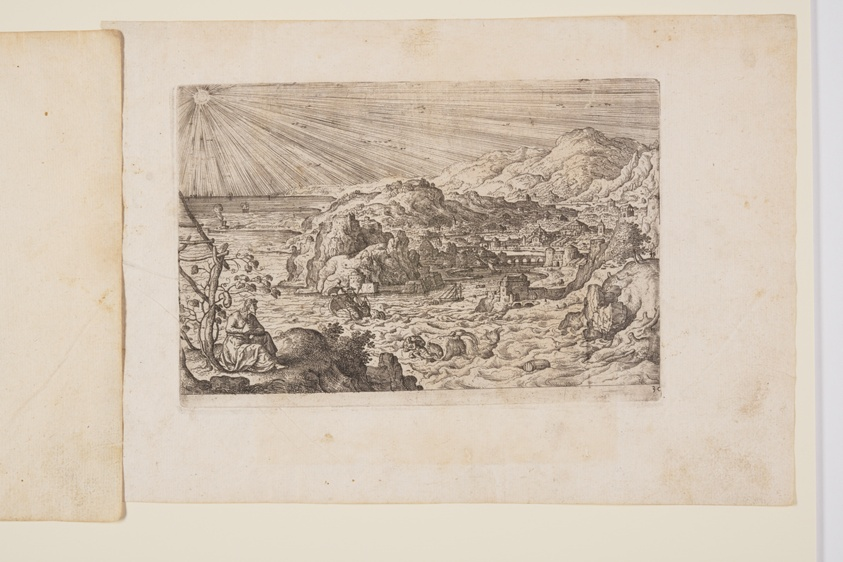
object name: Print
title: Plate 30, from Landscapes with Scenes from the Old and New Testament and Ovid’s Metamorphoses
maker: Hans Bol (Flemish, 1534–1593); published by Philip Galle (Flemish, 1537–1612)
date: 1574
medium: Etching on ivory laid paper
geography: Flanders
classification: print; paper; prints and drawing; etching